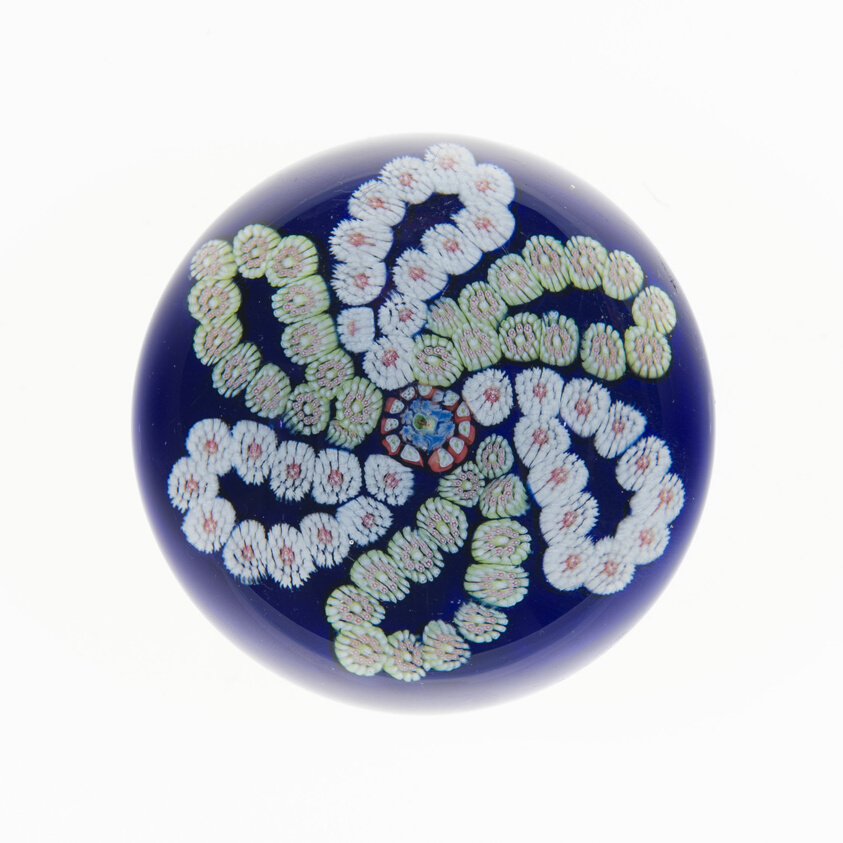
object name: Glass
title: Paperweight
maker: Saint-Louis Glassworks (Cristalleries de Saint-Louis); Lorraine, France, founded 1586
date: c. 1845/60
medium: Glass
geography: Saint-Louis-lès-Bitche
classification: paperweight; glass